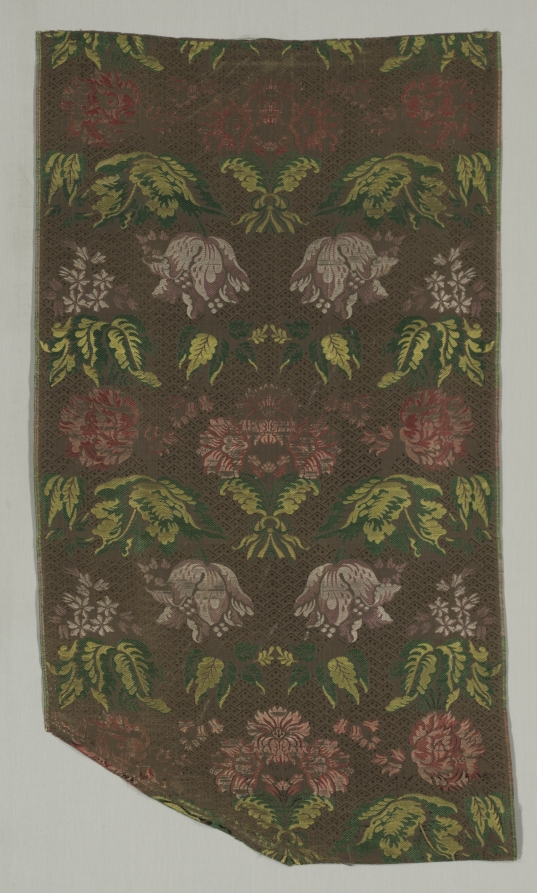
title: Length of Silk Textile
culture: Italy, 18th century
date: 1700s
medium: lampas weave, brocaded; silk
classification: Textile